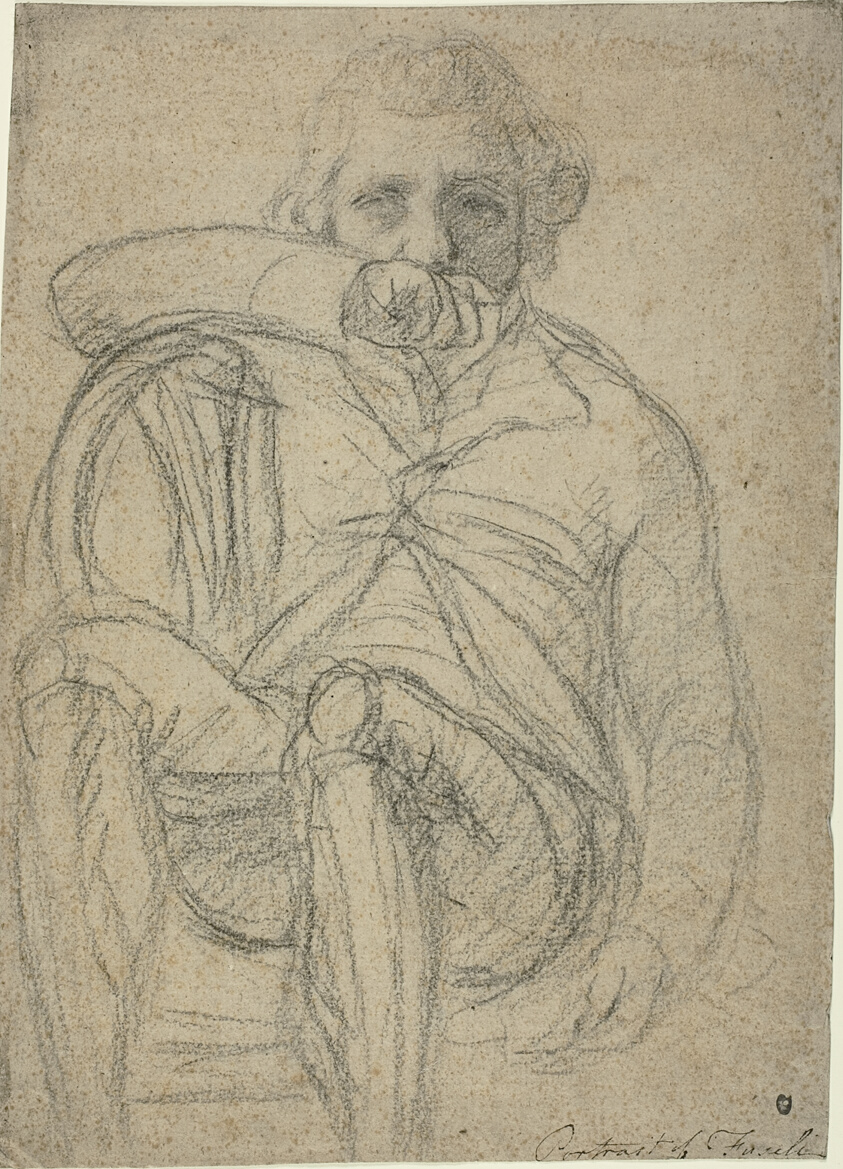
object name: Drawing and Watercolor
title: Portrait of Fuseli (recto); Sketch of a Hand (verso)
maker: Attributed to Henry Fuseli; Swiss, active in England, 1741-1825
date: 1761/1825 (recto); 1770/80 (verso)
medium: Black chalk (recto), and black and white chalk on gray prepared ground (verso), on tan wove paper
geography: England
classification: chalk; drawings (visual works); prints and drawing; paper